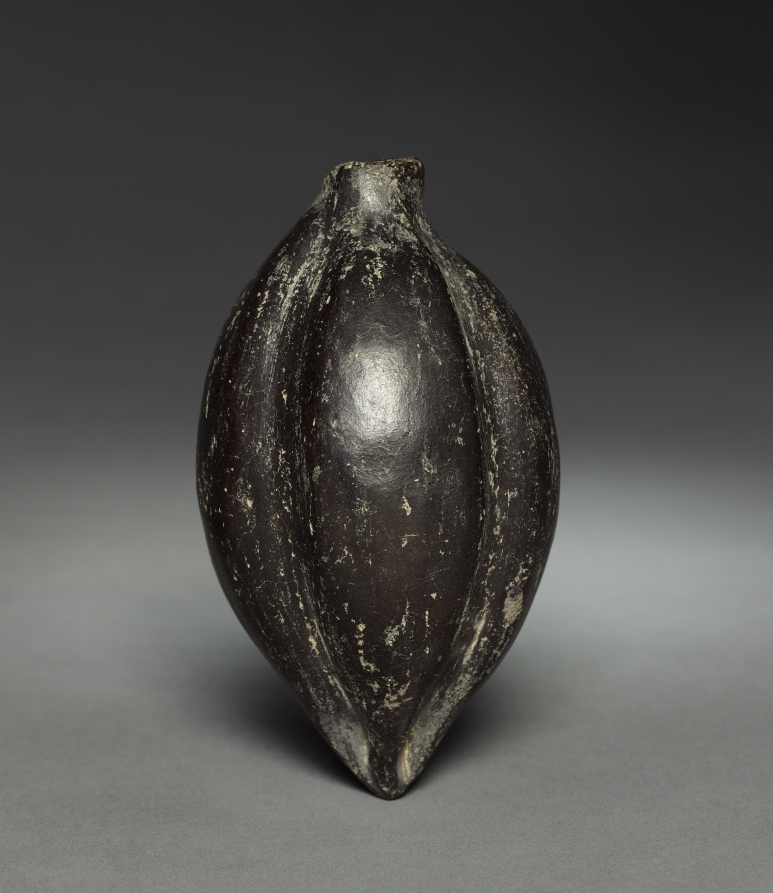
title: Fruit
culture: Colombia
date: before 1921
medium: pottery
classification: Ceramic